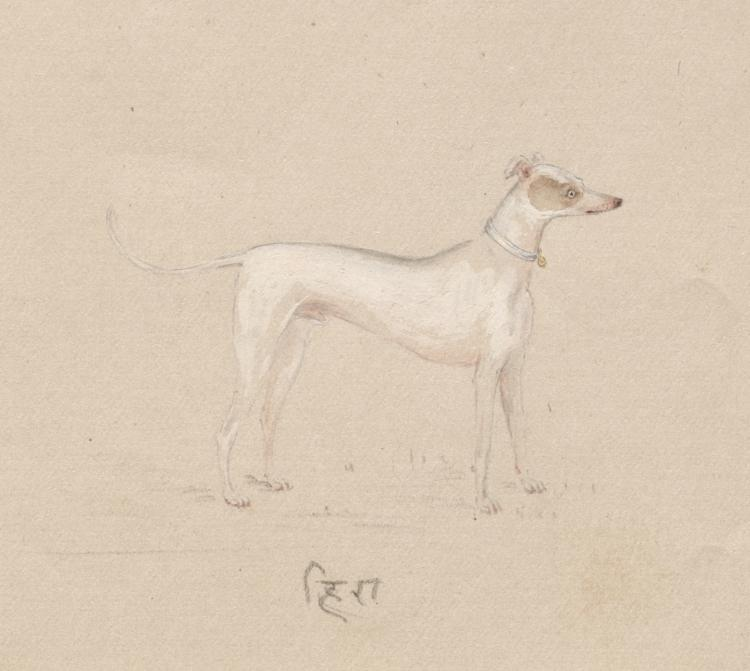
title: Hira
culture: British India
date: 1800s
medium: Gum tempera and graphite on paper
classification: Drawing